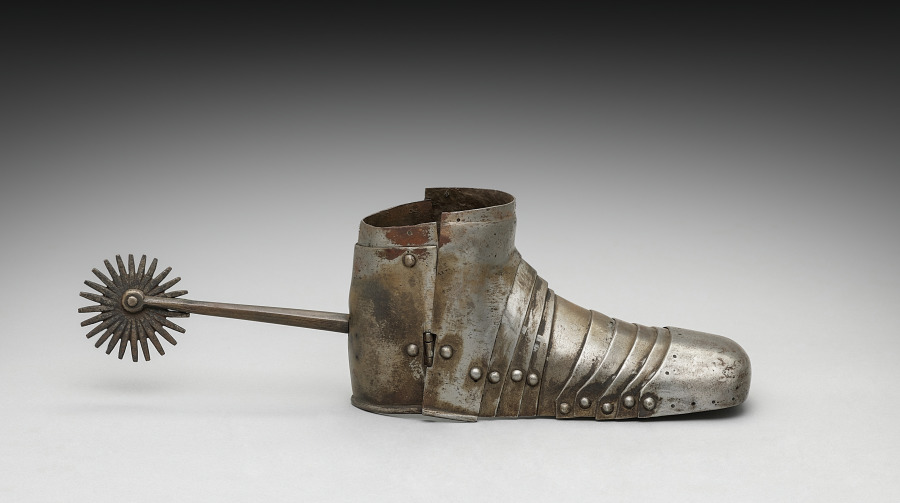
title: Right Sabatoun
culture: Germany, 19th century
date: 1801–1900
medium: steel with black paint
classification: Arms and Armor